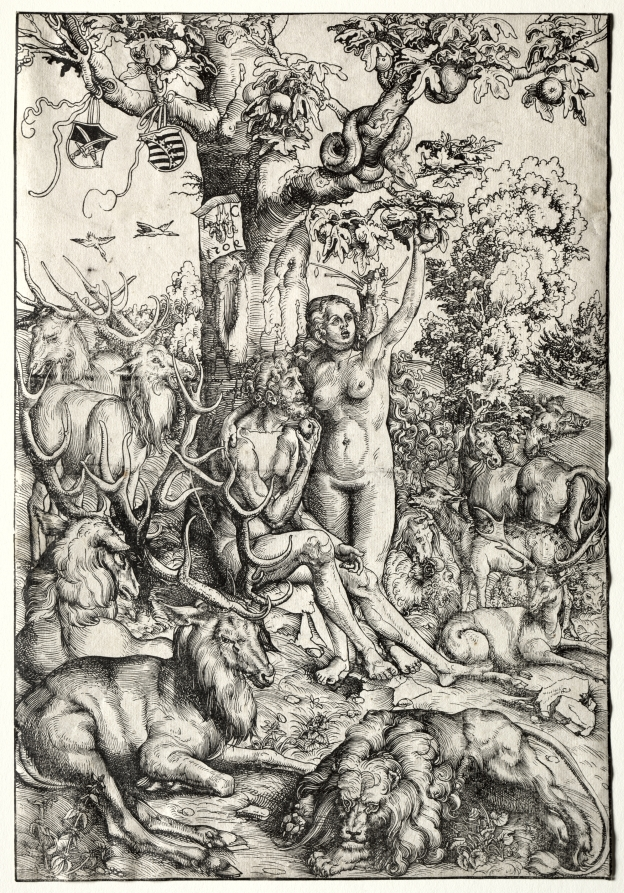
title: Adam and Eve in Paradise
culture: Germany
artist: Lucas Cranach (German, 1472–1553)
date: 1509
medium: woodcut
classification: Print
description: Lucas Cranach’s Eden shows the first couple just prior to tasting the forbidden fruit. Adam holds one fruit, and Eve plucks a second from the tree of knowledge. The composition is packed with stags, horses, sheep, and a lion, ram, and boar. Some of these are associated with human temperaments (personality types), but the many stags suggest more hunting ground than significant allegory. Cranach’s patron, Frederick, Elector of Saxony (1463–1525), whose coats of arms hang from the tree, was an avid hunter whose hunting grounds were perhaps a kind of paradise for him.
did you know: The coats of arms hanging from the tree in this image are those of the artist's patron, Frederick, Elector of Saxony (1463– 1525).